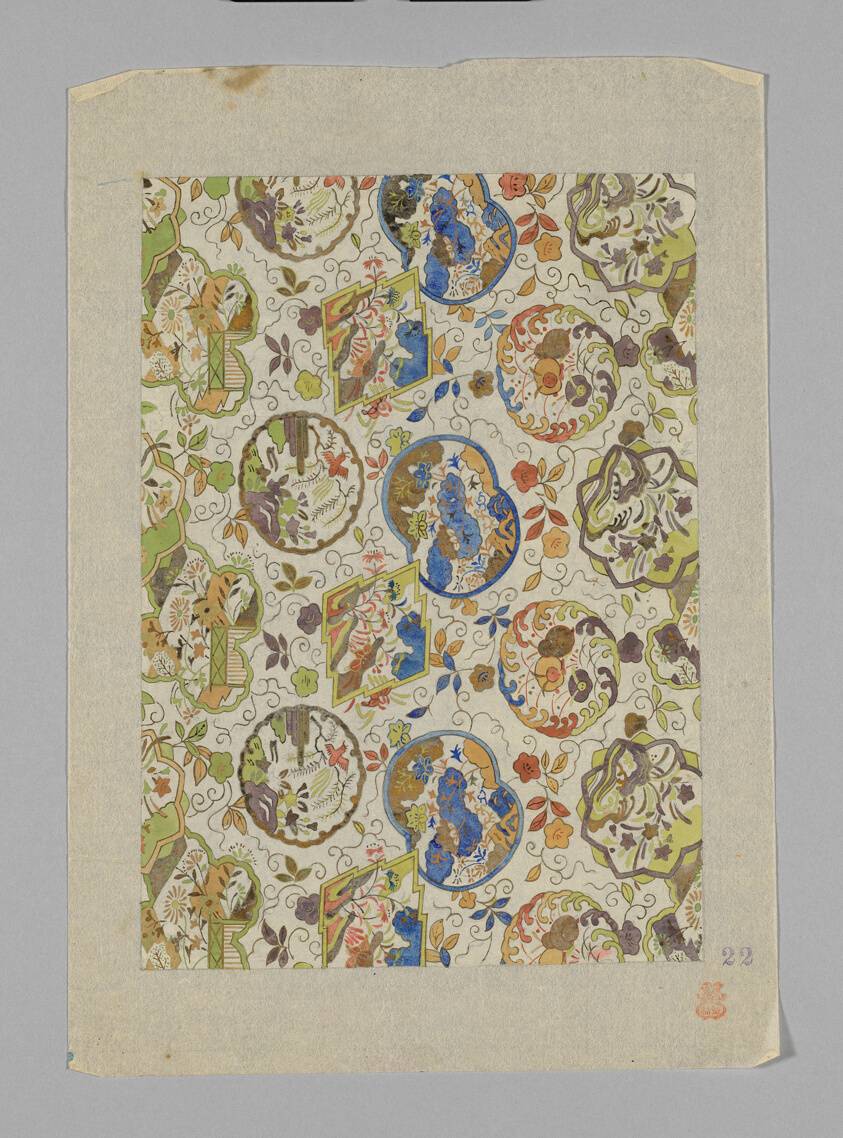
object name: Drawing and Watercolor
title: Design on Paper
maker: Japan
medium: Paper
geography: Japan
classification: textile; accessory - paper design; watercolor; paper